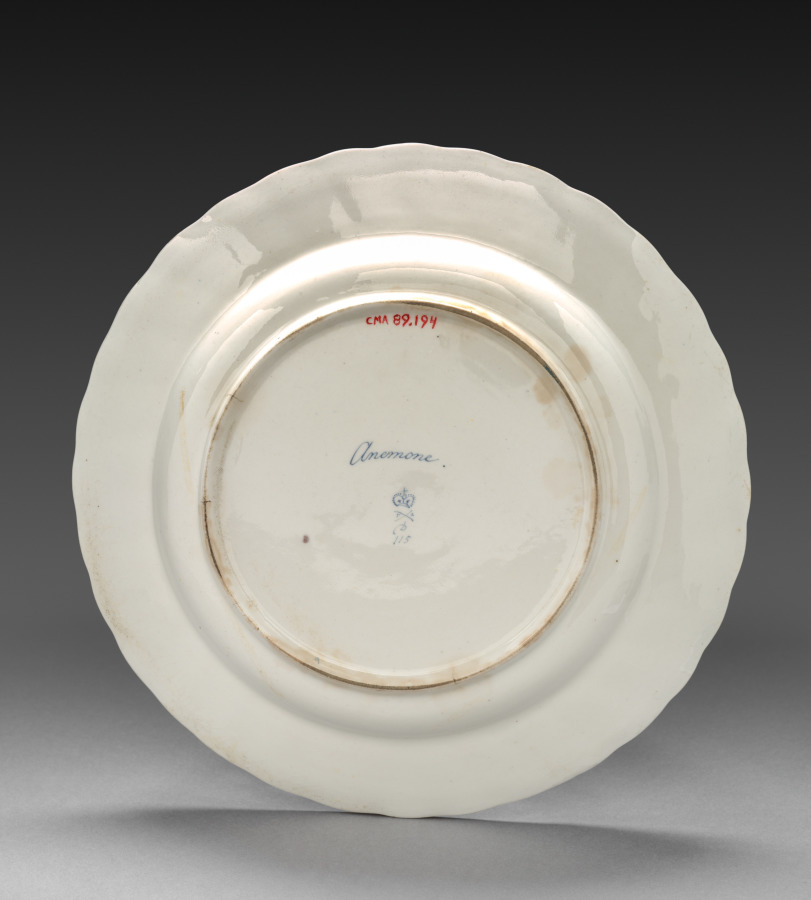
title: Plate from Dessert Service: Anemone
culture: England, Derby, 18th century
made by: Derby (Crown Derby Period) (British)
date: c. 1800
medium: porcelain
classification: Ceramic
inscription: inscribed in blue on back: Anemone./crown/crossed batons and dots/D/115. Near edge: 9.